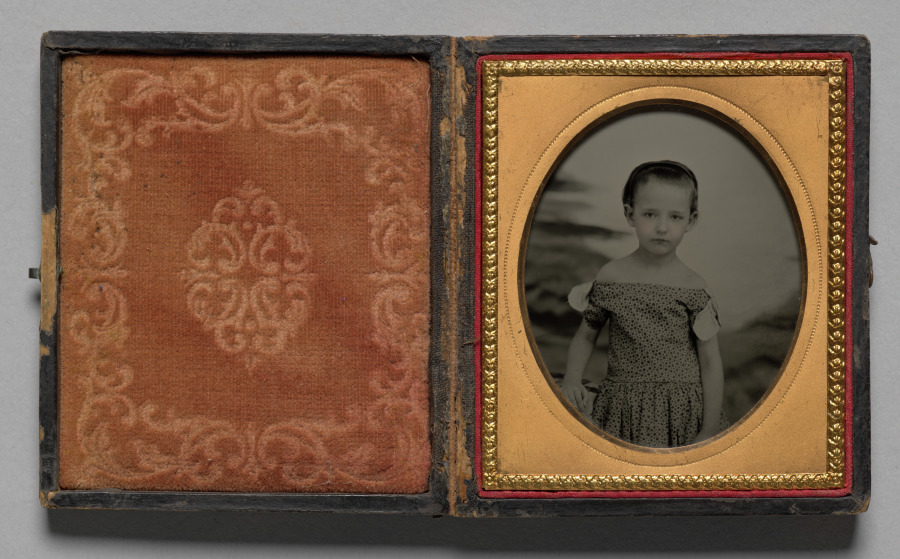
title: Child in off-shoulder polka dot dress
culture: America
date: c. 1860–65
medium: ambrotype, sixth plate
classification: Photograph